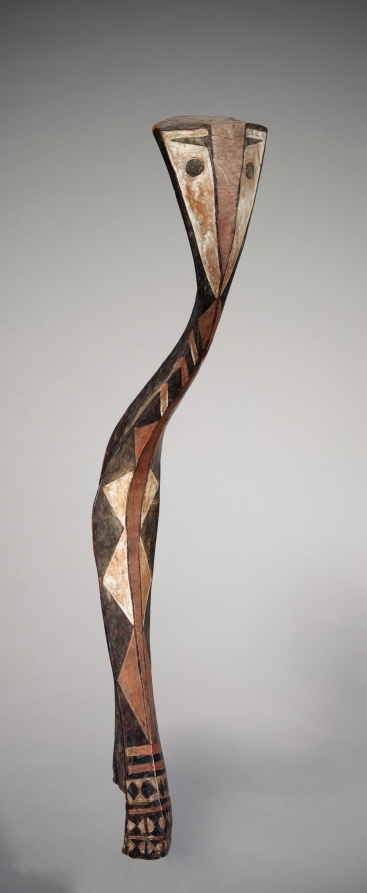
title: Serpent Headdress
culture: Africa, West Africa, Guinea, possibly Baga-style maker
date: late 1800s–early 1900s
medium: Wood (Nauclea pobeguinii) and paint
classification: Mask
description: Traditionally, Baga society was ruled by village councils of elders who derived their power from their direct contact with spirit entities through lifelong initiation rituals and the accumulation of secret knowledge. Two different religious orders controlled initiations, providing the context for much Baga art. One was identified as female, the other as male, though only men belonged to both groups. Initiations in each order followed three stages, culminating in the revelation of the highest spirit being. This type of Baga headdress embodied the serpent spirit Ninkinanka, honored for giving rain, bestowing riches, and bringing forth children. The serpent figure would be placed on top of a conical framework of palm branches carried on a male dancer’s head. It appeared at the end of the first level of the initiation for boys and girls or just before the circumcision at the beginning of the boys’ initiation.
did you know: In the context of boys' initiations, the serpent headdress was sometimes identified as the rainbow, which the Baga and their neighbors associate with beginnings and endings, life and death, and the continuation of lineages.